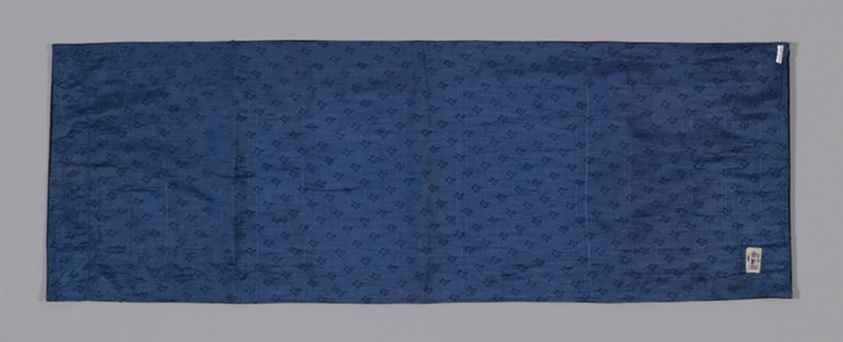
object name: Textile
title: Panel (Furnishing Fabric)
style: qing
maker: China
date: Qing dynasty (1644–1911), 1875/1900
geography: China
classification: textile; needlework (visual works); weaving; furnishing textile